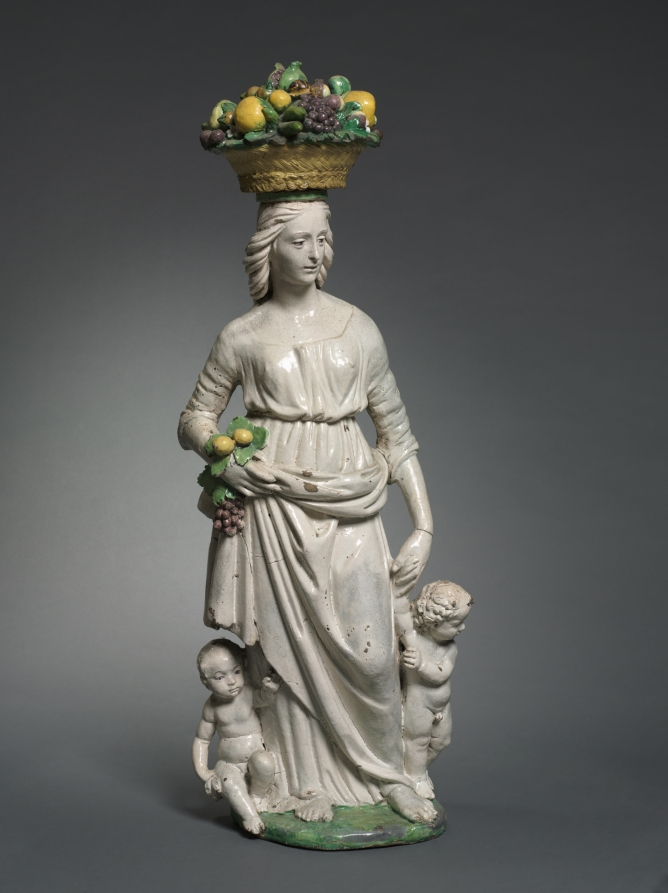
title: Dovizia (Plenty)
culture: Italy, Florence, 16th century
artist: Giovanni della Robbia (Italian, 1469–1529/30)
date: c. 1520–29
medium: glazed terracotta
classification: Sculpture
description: Many elite Florentine Renaissance homes had sculptures of idealized young women carrying nature’s bounty, such as this work. The motif stems from a statue by Donatello (about 1386–1466) that towered over Florence’s main public market. At home, however, the sculpture became a talisman for the family’s well-being. The city-state’s low birth rate was a serious political matter, and such a sculpture was believed to stimulate fertility while also promoting motherhood and bolstering financial success.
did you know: Inspired by an over life-sized, public sculpture by Donatello, Giovanni della Robbia reduced the figure for a domestic setting.